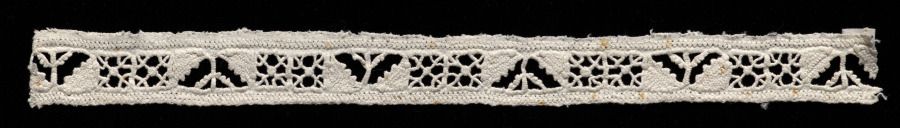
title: Lace Fragment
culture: Italy, Venice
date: 1500s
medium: Linen: needle lace, reticella insertion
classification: Lace